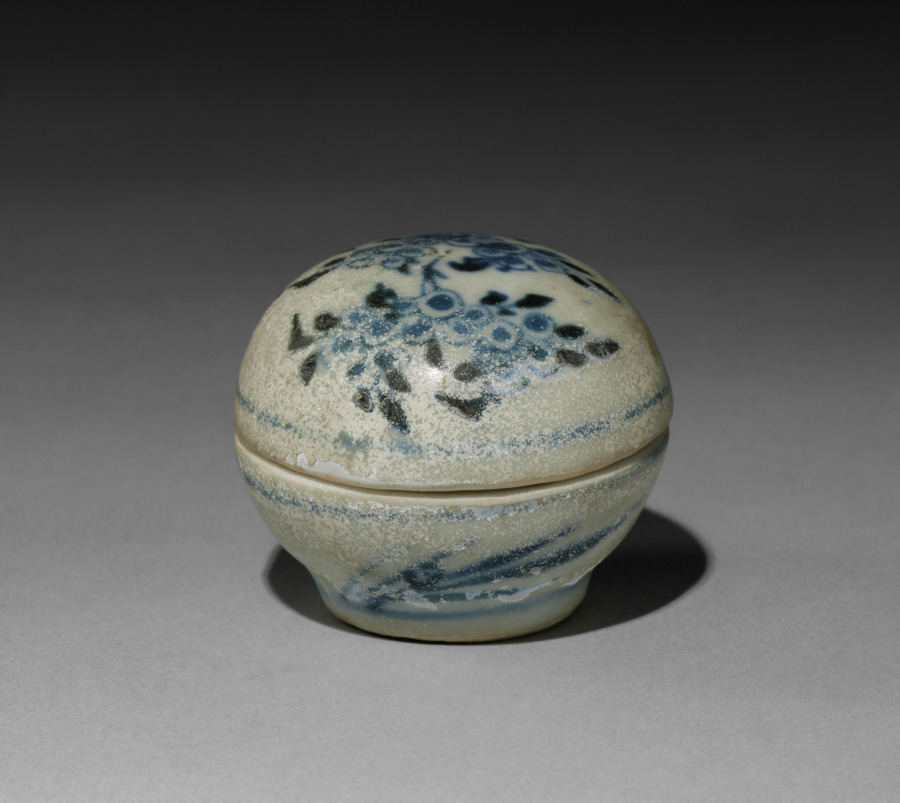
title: Pill Box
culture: China, Qing dynasty (1644-1911)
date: c. 1752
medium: porcelain with blue and white decoration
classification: Ceramic